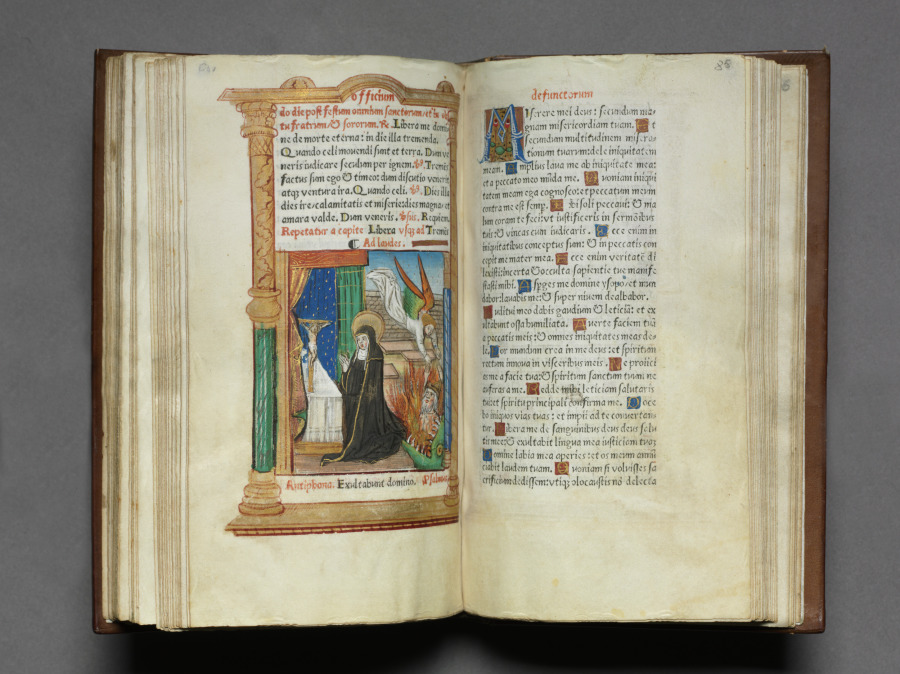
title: Printed Book of Hours (Use of Rome)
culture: France, Paris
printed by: Guillaume Le Rouge (French, Paris, active 1493–1517)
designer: Master of the Très Petites Heures of Anne of Brittany (French, Paris, active c.1480–1510)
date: 1510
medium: 112 printed folios on parchment, bound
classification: Bound Volume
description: Printed books of hours were produced between 1485 and 1520. Significantly less expensive than handwritten production, printing made the popularity of books of hours soar. More than 1,775 different versions were printed during this time, allowing much customization. This hybrid version has printed text but hand-colored images and comes from Paris, a major center of book production.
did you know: The workshop of Guillaume le Rouge was in the Neuve Notre-Dame near Paris’s Notre Dame Cathedral.